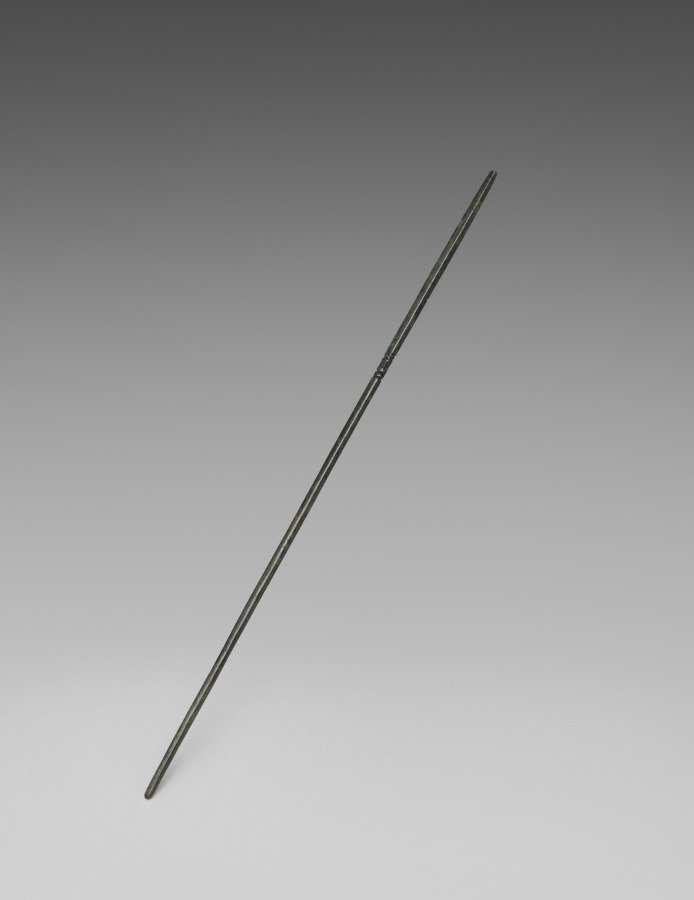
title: Chopstick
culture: Korea, Goryeo dynasty (918–1392)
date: 918–1392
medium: bronze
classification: Metalwork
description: In Korea, chopsticks made of metal such as brass, silver, and gold were excavated from ancient tombs and ruins dated to the 6th century at the earliest. Burial goods often include utilitarian objects such as table wares and utensils because the dead were believed to need them in the afterlife.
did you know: In contrast to the Chinese and Japanese, Koreans still prefer metal chopsticks (stainless steel and brass) to wooden ones.